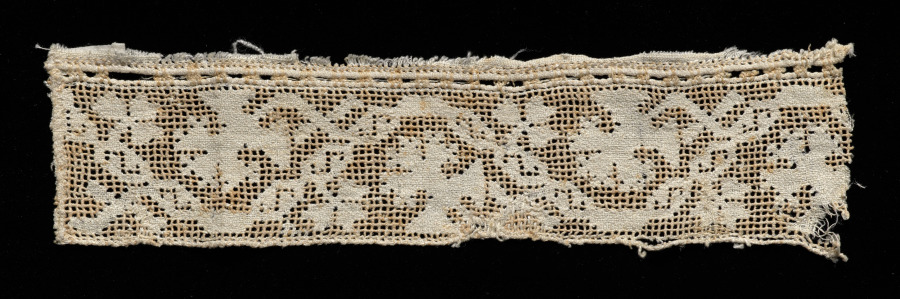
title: Lace fragment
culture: Italy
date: 1500s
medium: Linen: needle lace (drawnwork) insertion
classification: Lace